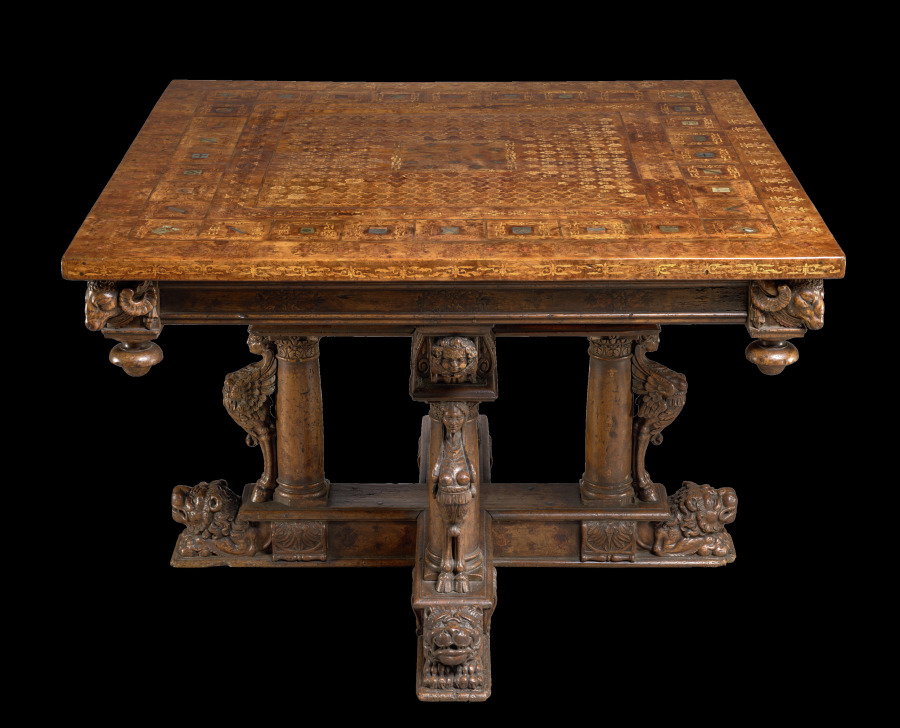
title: Inlaid Table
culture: France, Burgundian School, 16th century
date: 1550–1599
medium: walnut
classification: Furniture and woodwork